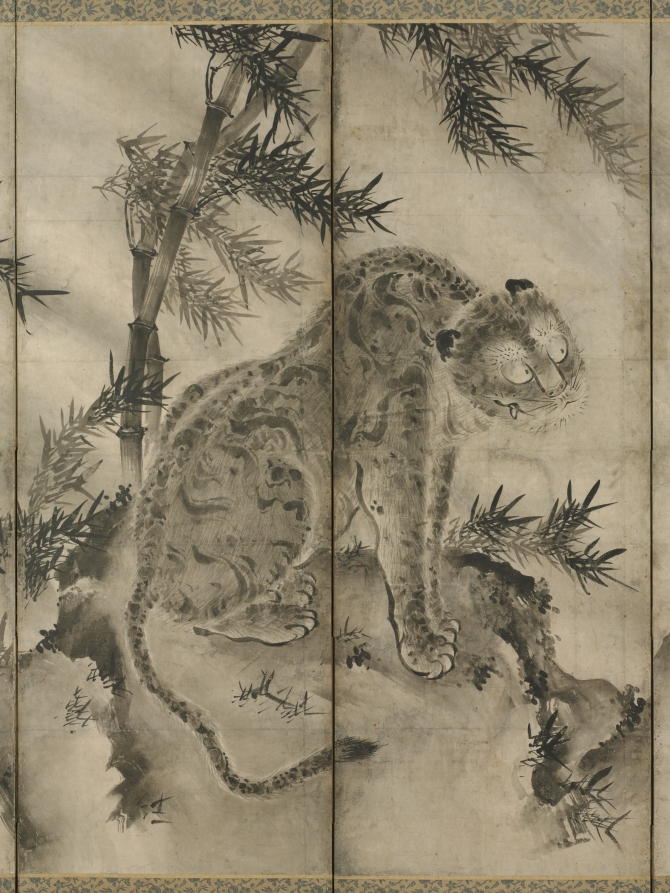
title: Dragon and Tiger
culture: Japan, Muromachi period (1392–1573) to Momoyama period (1573–1615)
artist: Sesson Shūkei (Japanese, c. 1492–c. 1577)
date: c. 1546–56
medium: One of a pair of six-panel folding screens; ink on paper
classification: Painting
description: In Chinese cosmology, the tiger's roar is said to produce wind. In Chinese paintings, the tiger is often shown with a dragon, who creates rain clouds. Together, they represent the balancing forces of the universe. Chinese presentations of the theme, often in hanging scroll format, provided the basic composition for the pair of screens to which this one belongs.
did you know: Although the theme of this painting derives from Chinese philosophy and pictorial culture, Sesson's tiger is likely modeled after Korean prototypes of the Joseon period circulating in Japan.